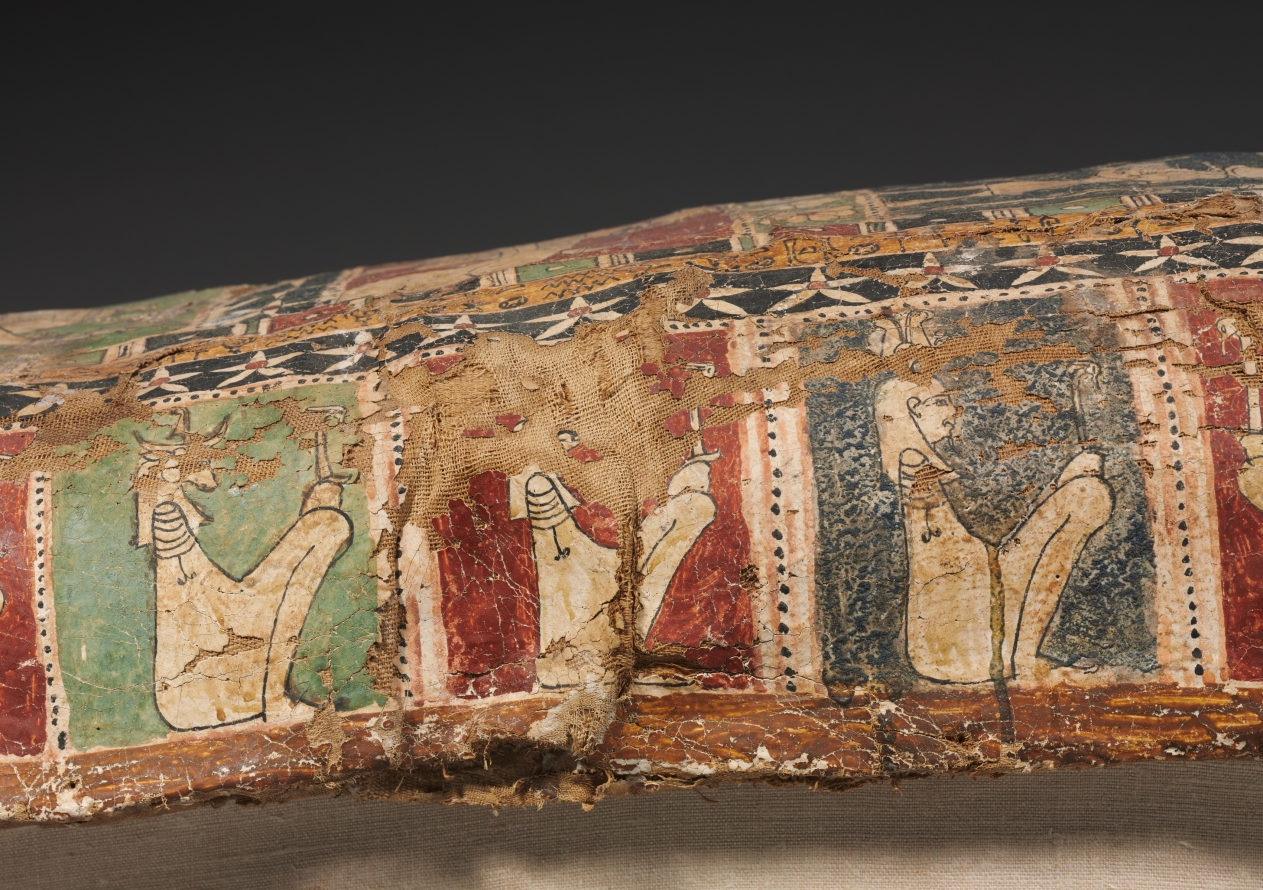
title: Cartonnage Mummy Case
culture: Egypt, Greco-Roman period (332 BCE–395 CE), Ptolemaic dynasty (305–30 BCE)–Roman empire (30 BCE–395 CE)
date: c. 50 BCE–50 CE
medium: cartonnage, painted and gilded, with glass inlays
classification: Funerary Equipment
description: This mummy case is made of cartonnage, a material similar to papier-mâché, but using layers of linen rather than paper. Cartonnage mummy cases such as these are contemporary with funerary portraits painted on wood or linen, although they present a very different appearance. The face, modeled in plaster, is bland and idealized, although the effect of the gilding and glass inlays is quite dazzling. The body is painted with traditional, age-old funerary motifs: the god Osiris, seated and mummiform; the fetish of Abydos, holy city of Osiris, flanked by standing deities (Thoth and Shu); a Horus falcon with outspread wings, and the bark of Sokar. Below these are the sandaled feet of the deceased. On the sides are rows of seated deities. On the top of the head are a winged scarab beetle flanked by Anubis jackals. On the foot are painted the soles of the deceased’s sandals, flanked by scorpions for protection.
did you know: This coffin is smaller and later in date than the other coffins in this gallery. It is made of cartonnage, which used layers of linen to create a material similar to papier-mâché. The painted portrait head displays the influence of Roman portraiture at this time and incorporates both gilding and glass inlays. Despite the fragile materials, this mummy case survived due to the very dry desert climate in which it was found.